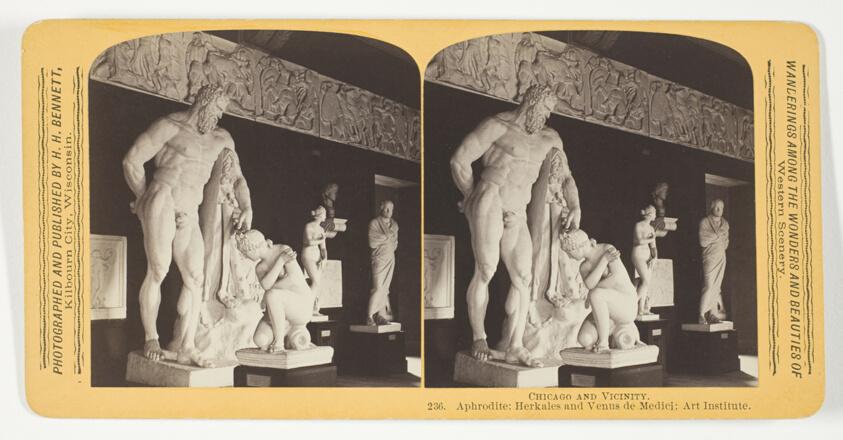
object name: Photograph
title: Aphrodite; Herkales and Venus de Medici; Art Institute, from the series "Chicago and Vicinity"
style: 19th century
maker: Henry Hamilton Bennett (American, born Canada, 1843-1908)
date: 1893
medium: Albumen print, stereo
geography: Chicago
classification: photography; photograph; albumen silver print; stereograph (albumen)